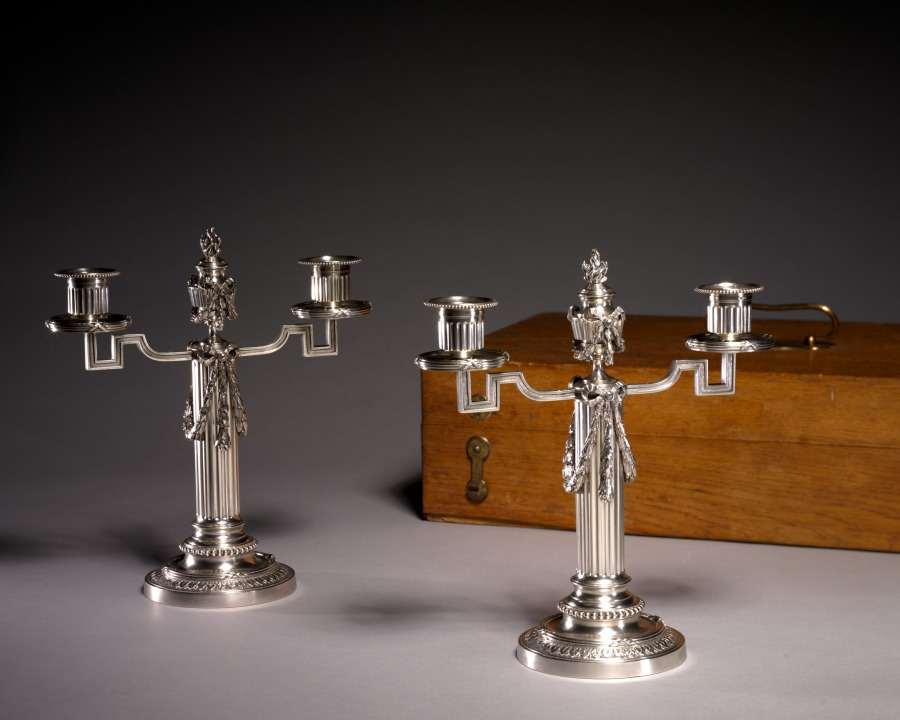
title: Pair of Candelabra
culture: Russia, St. Petersburg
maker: House of Fabergé (Russian, 1842–1918)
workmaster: Julius Alexandrovitch Rappoport (Russian, 1864–1916)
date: 1887–90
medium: silver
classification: Silver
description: This pair of candelabra demonstrates Fabergé’s commitment to a commercial balance between decorative and functional design. The pair was made by Fabergé’s chief silversmith, German-born Julius Rappoport, in Moscow, where the majority of gold and silver objects were crafted. Small in size, the pair may have been used in more intimate settings, as opposed to larger banquets or public gathering areas.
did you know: The design reflects the resurgence of the neoclassical style in the late 1800s.